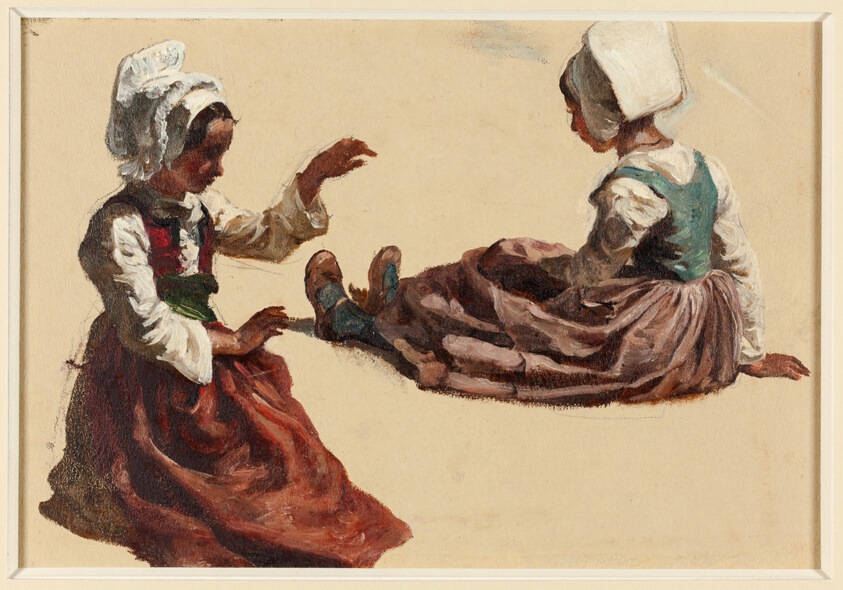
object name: Drawing and Watercolor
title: Two Girls in Regional Costume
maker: François Hippolyte Lalaisse (French, 1810-1884)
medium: Oil paint, over graphite, on tan wove paper (discolored), prepared with a textured oil ground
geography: France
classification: drawings (visual works); prints and drawing